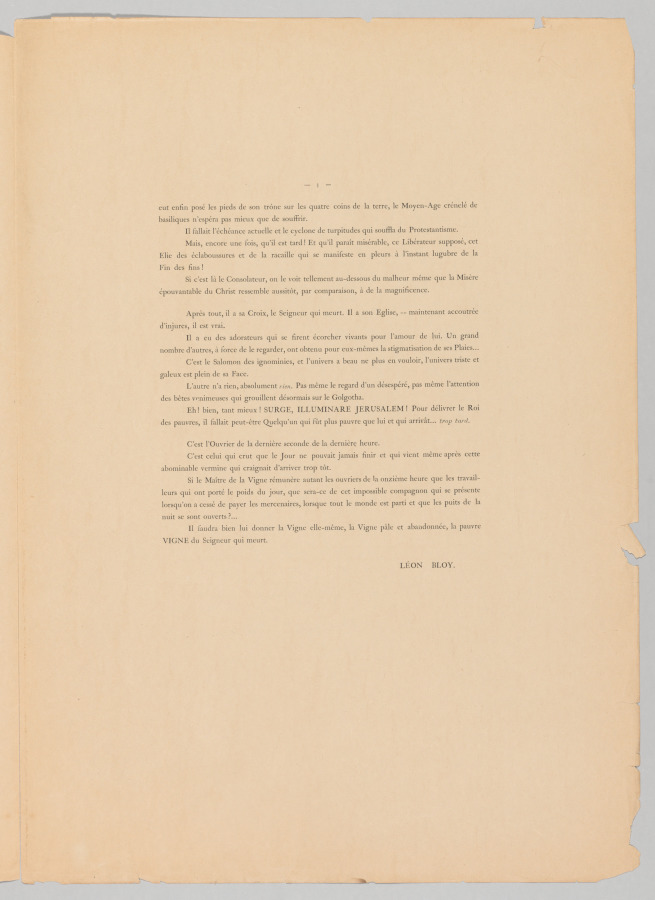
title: The Vintages: The Vintages!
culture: Belgium, 19th century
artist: Henri de Groux (Belgian, 1867–1930)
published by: L'Estampe Originale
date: 1894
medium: letterpress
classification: Print